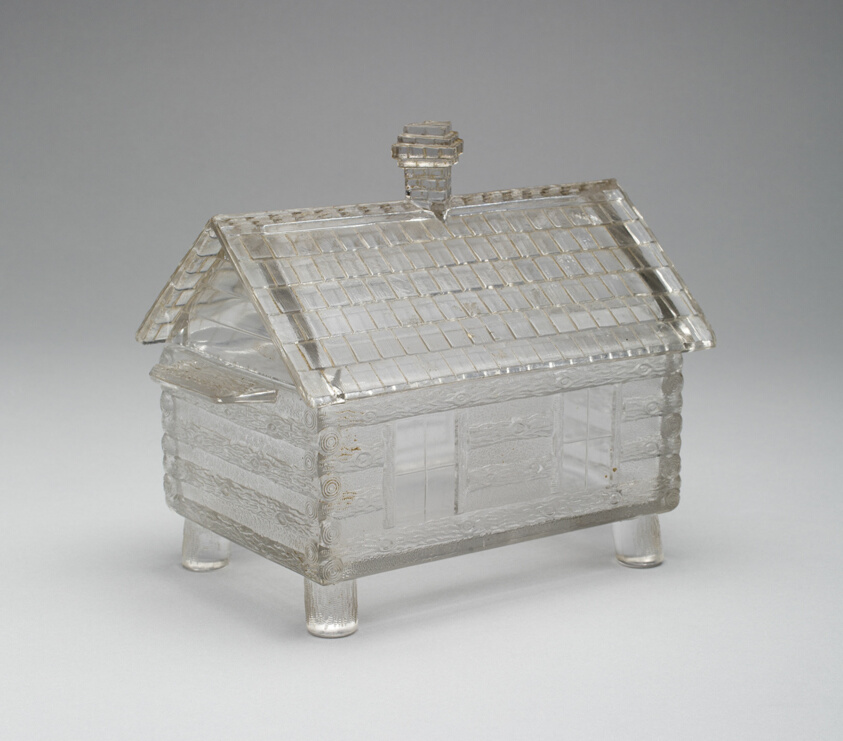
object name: Glass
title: "Log Cabin" pattern covered dish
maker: Central Glass Company; American, 1867–1896; Wheeling, West Virginia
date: c. 1875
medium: Pressed glass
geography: Wheeling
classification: dish (vessel); glass; american decorative arts; american arts; decorative arts